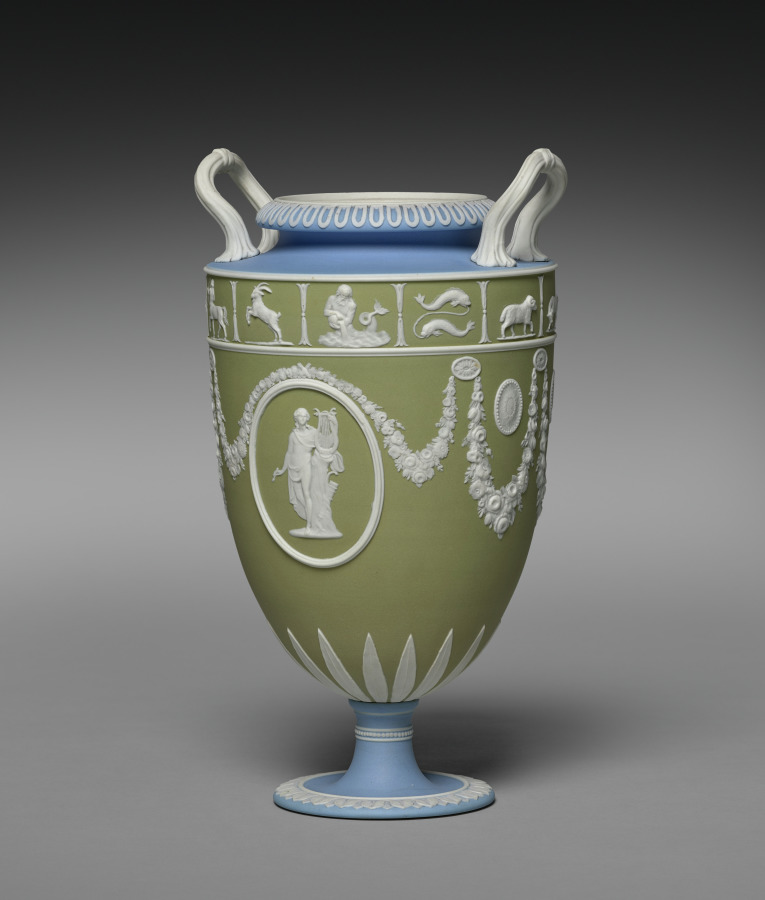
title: Vase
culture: England, Staffordshire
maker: Josiah Wedgwood and Sons (British, Staffordshire, est. 1759)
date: c. 1850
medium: jasper ware with relief decoration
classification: Ceramic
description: Wedgwood's tricolor jasperware first became popular in the 1770s during a period of fascination with neoclassical decoration. This vase was probably made around 1850 during the period when this type of decoration was revived. The relief medallions depict two versions of the Greek god Apollo, the god of music, next to his harp or lyre.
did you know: See cover record.